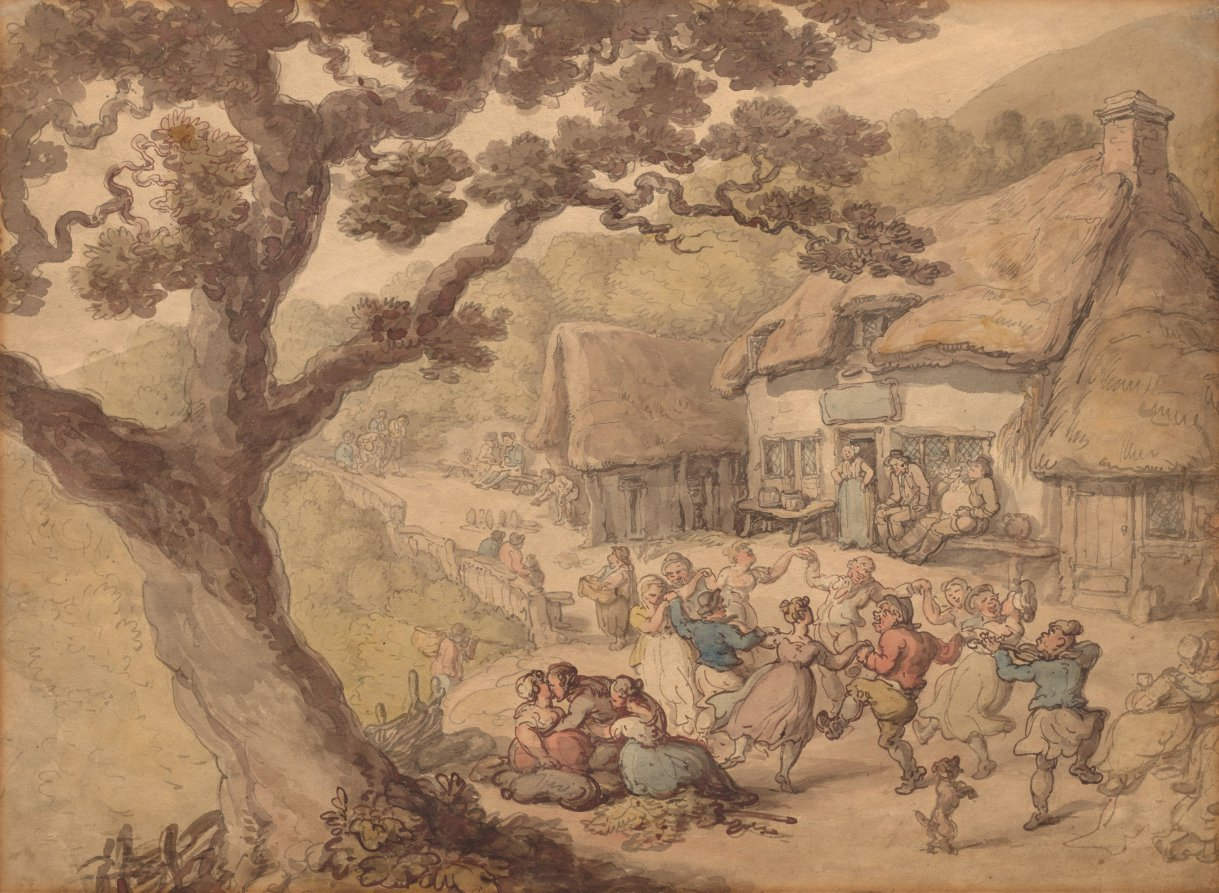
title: The Village Dance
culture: England, 18th-19th century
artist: Thomas Rowlandson (British, 1756–1827)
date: c. 1815–25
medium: watercolor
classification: Drawing